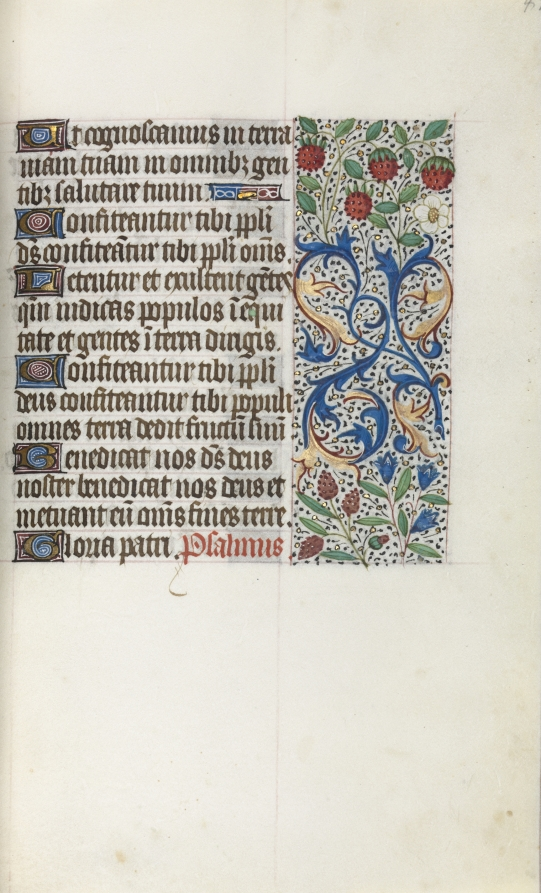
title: Book of Hours (Use of Rouen): fol. 41r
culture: France, Rouen, 15th century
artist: Master of the Geneva Latini (French, active Rouen, 1460–80)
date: c. 1470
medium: ink, tempera, and gold on vellum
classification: Bound Volume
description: In the late 1400s and early 1500s Rouen was an established and important center of book production. The city’s cathedral had a wealthy chapter that spent large sums of money to commission books and to maintain its extensive library. The stationers and booksellers would have likely been concentrated in or near the cathedral precinct. This artist, named after a manuscript now in Geneva, was Rouen’s principal illuminator during the second half of the 1400s.